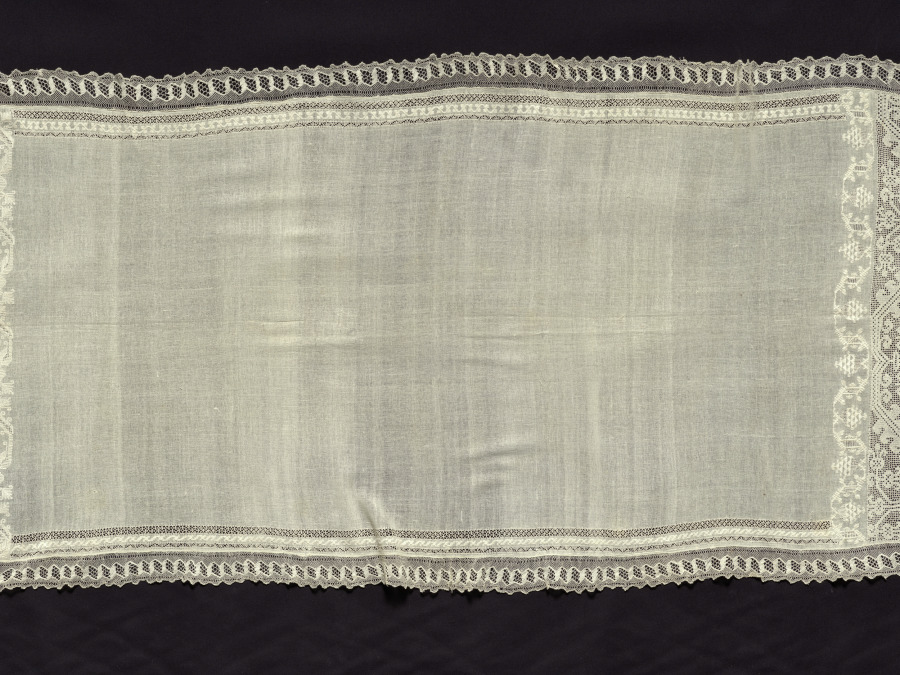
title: Cloth with Border of Vegetal Motifs and Insertion with Bird Motifs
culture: Cyprus ?, 1700s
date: 1700s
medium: Plain weave wool with needle lace, burato insertion (twined ground and darned in two directions), filet/lacis border and edging (knotted ground and darned in one direction), drawn work, and embroidery; bleached linen (est.), wool (est.), and cotton (est.)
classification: Lace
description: Textiles often incorporate multiple needlework techniques within a single piece. One of the techniques in this example of lace is called cutwork. In cutwork, portions of the textile ground, such as a linen or cotton cloth, are cut away and threads are removed to create holes. The edges of the hole are then reinforced with embroidery and a pattern of needle lace can be created within the perimeter. Rather than adding to the cloth to create a design, the craftsperson removes threads to fabricate a pattern.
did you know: This lace was given to the museum by Louise Tifft Brown, a native Clevelander who became an expert in lace while living in Venice for 35 years.